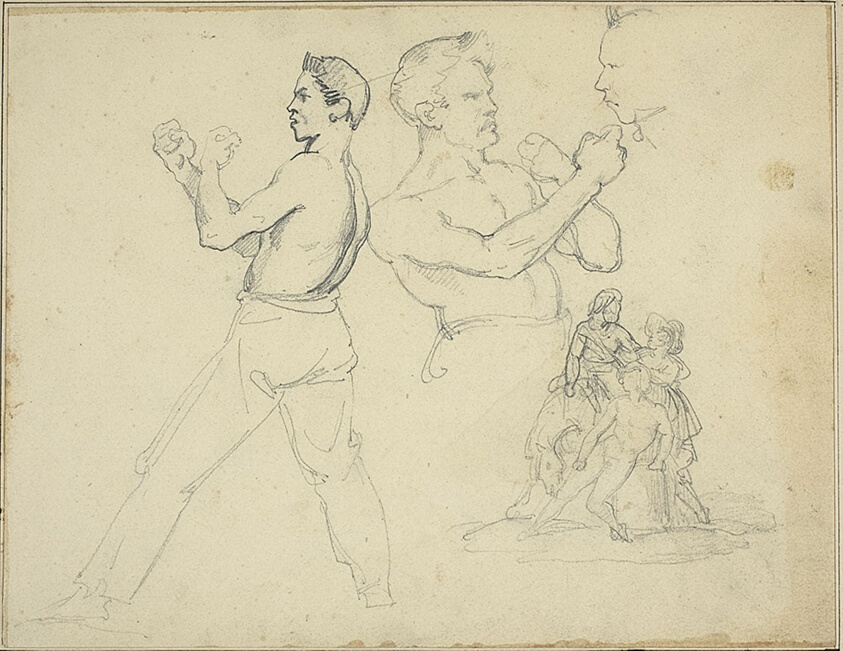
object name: Drawing and Watercolor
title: Studies of Boxers and Sketch of Horseman Attended by Two Figures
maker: Jean Louis André Théodore Géricault (French, 1791-1824)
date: 1818/1819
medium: Graphite, on cream wove paper, perimeter mounted on cream wove paper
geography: France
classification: graphite; drawings (visual works); prints and drawing